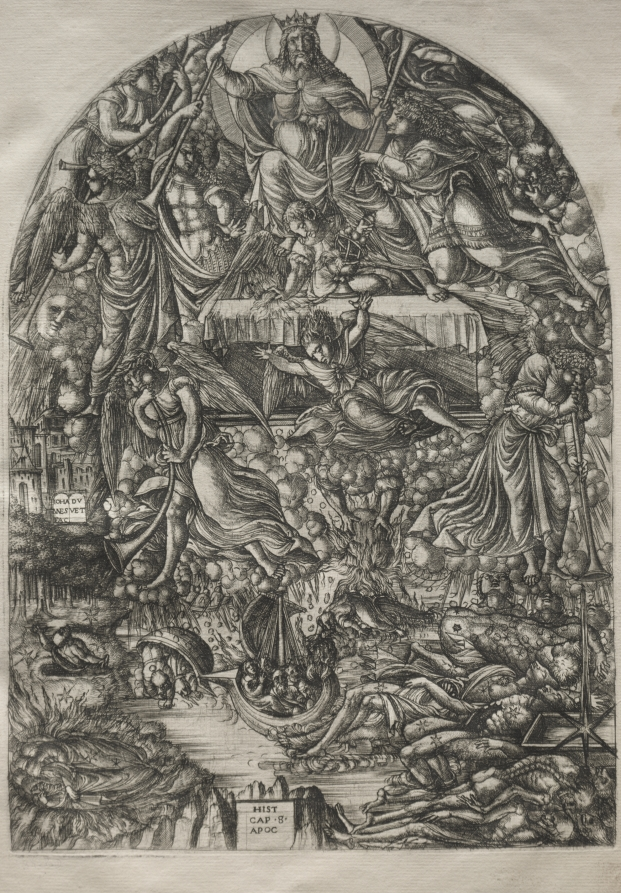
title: The Apocalypse: The Opening of the Seventh Seal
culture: France, 16th century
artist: Jean Duvet (French, 1485–1561)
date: 1546–1556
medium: engraving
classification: Print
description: This print is part of a bound volume of works illustrating the a narrative of the Apocalypse, taken from the Revelation of Saint John in the Bible. The 23 engravings in the series occupied the artist for a number of years and represent his greatest artistic achievement. The museum's volume is one of only seven known complete sets. Jean Duvet was one of the first major printmakers in France and one of the most original artists of the 1500s. Although he worked mostly in the provincial city of Langres, he became aware of Italian art through the circulation of prints—notably those of Marcantonio Raimondi. His solidly modeled human figures reflect the influence of the Italian High Renaissance. Duvet, however, developed an idiosyncratic, highly artificial style with crowded compositions that ignore rational space in favor of ornamental surface patterns.